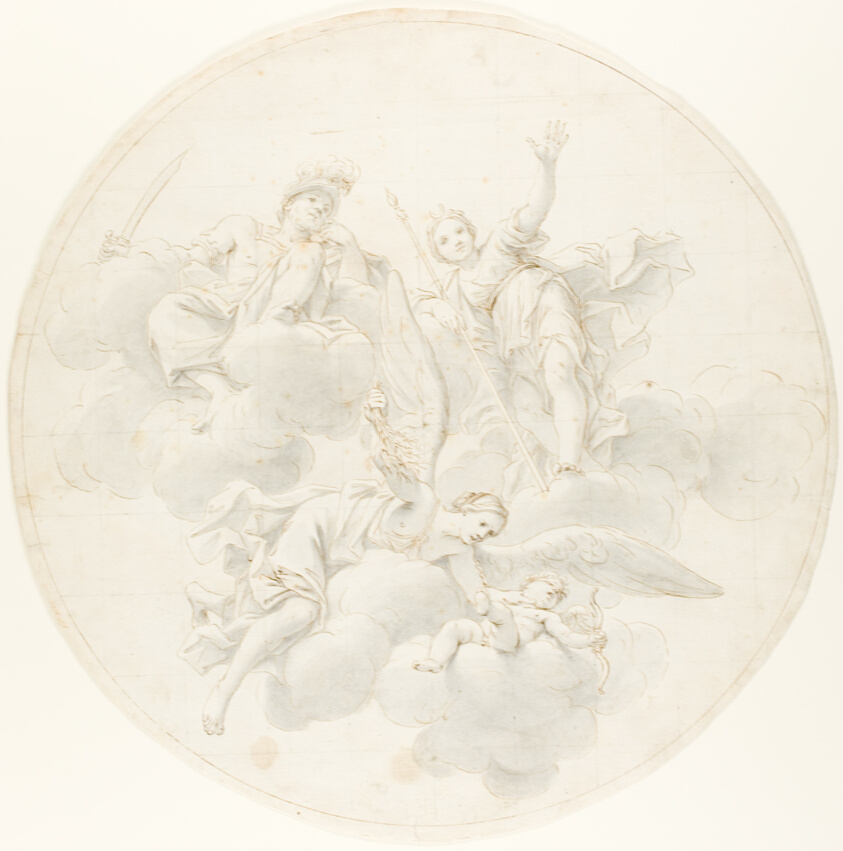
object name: Drawing and Watercolor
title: The Chastisement of Cupid by Jealousy in the Presence of Diana and Mars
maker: After Marcantonio Franceschini; Italian, 1648-1729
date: 1692/1700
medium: Pen and brown ink, with brush and gray wash, over traces of black chalk, squared in black chalk, on ivory laid paper, laid down on ivory laid paper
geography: Italy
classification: pen and ink drawings; drawings (visual works); prints and drawing